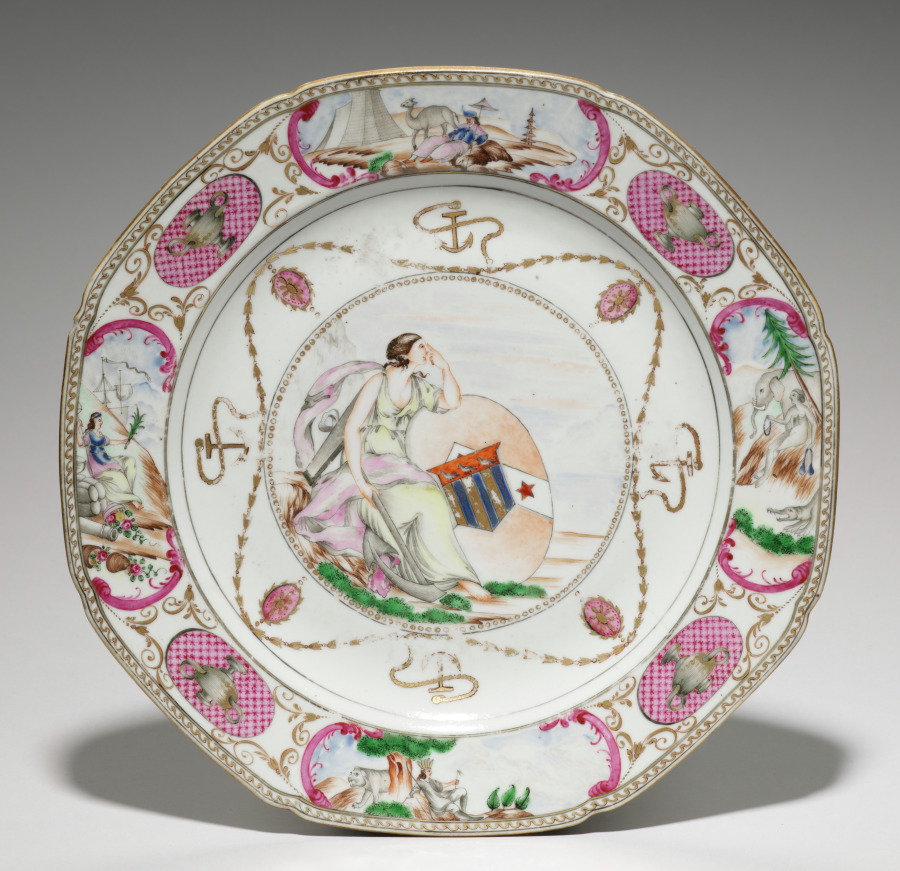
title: Plate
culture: China, Chinese Export, early 19th century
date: c. 1800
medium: porcelain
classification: Ceramic